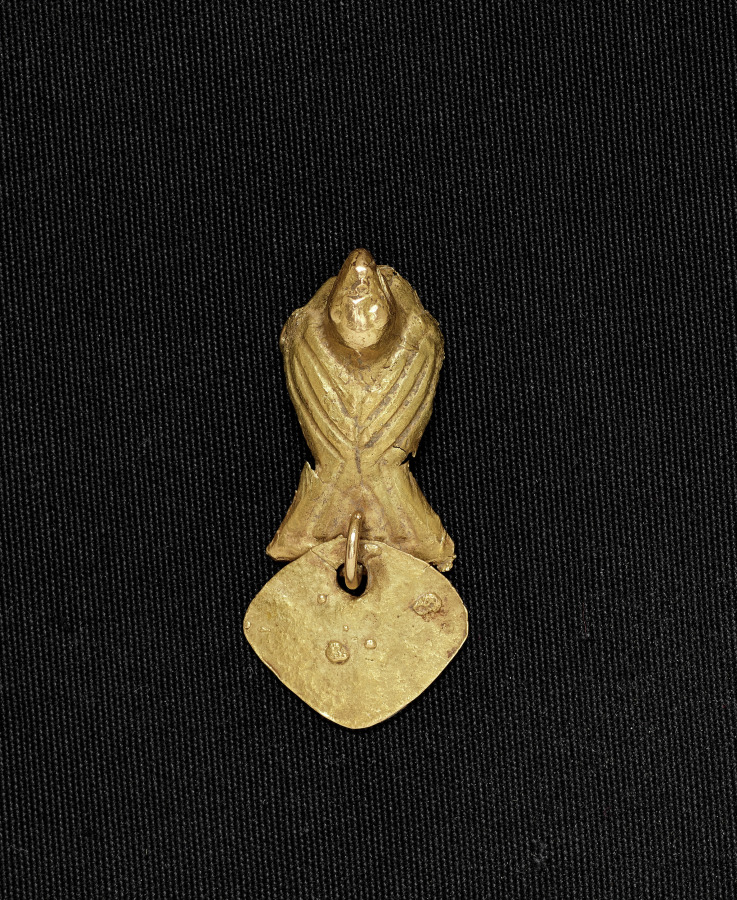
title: Bird Bead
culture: Colombia, Muisca style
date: c. 900–1550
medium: cast gold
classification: Jewelry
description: Muisca metalwork divides into two categories: ornaments to be worn, such as these, and offering figurines, in the case to the right. The elaborate bird pendant features delicate herringbone moldings, openwork patterns, and wing details-all part of the wax model from which the pendant was cast (see nearby computer animation). The dangles were attached after casting.